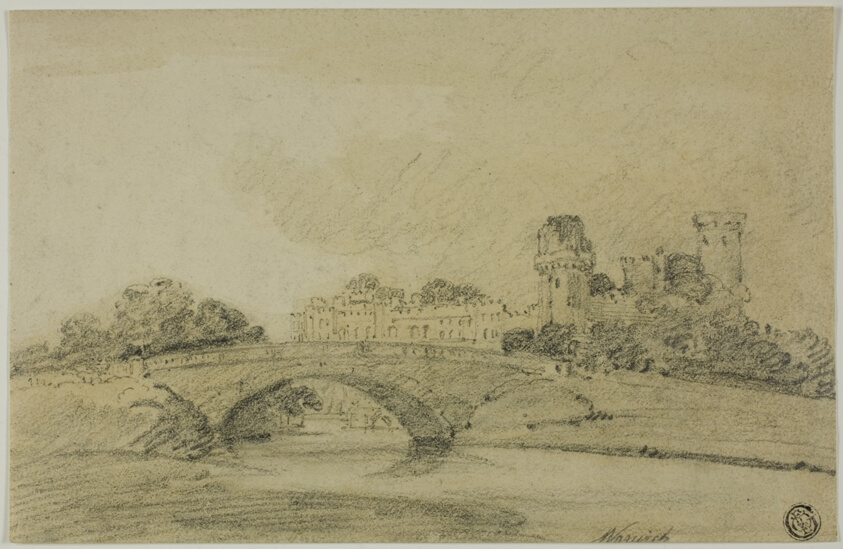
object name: Drawing and Watercolor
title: Warwick Castle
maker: Attributed to Thomas Girtin; English, 1775-1802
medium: Graphite on cream wove paper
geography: England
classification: drawings (visual works); prints and drawing